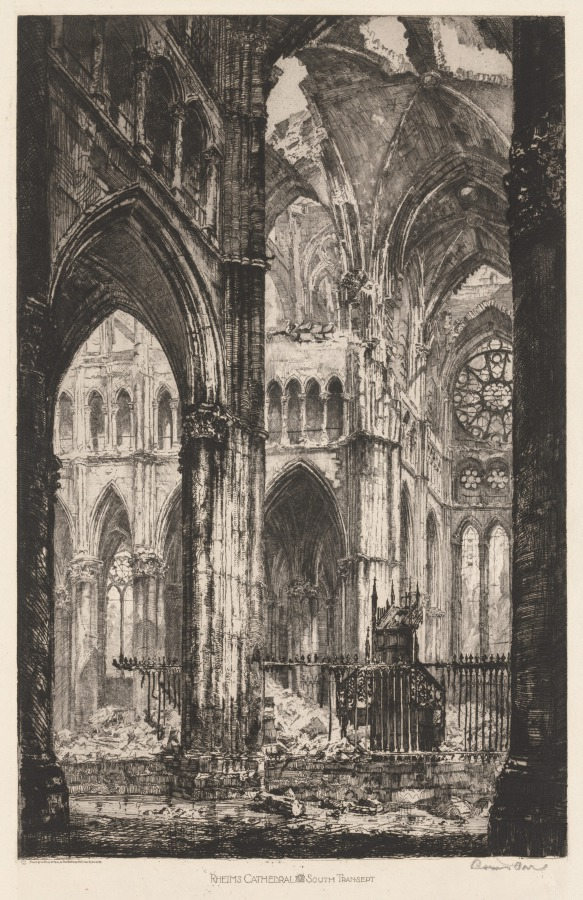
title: Rheims Cathedral, South Transept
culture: America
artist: Louis Orr (American, 1879–1966)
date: before 1920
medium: etching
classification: Print